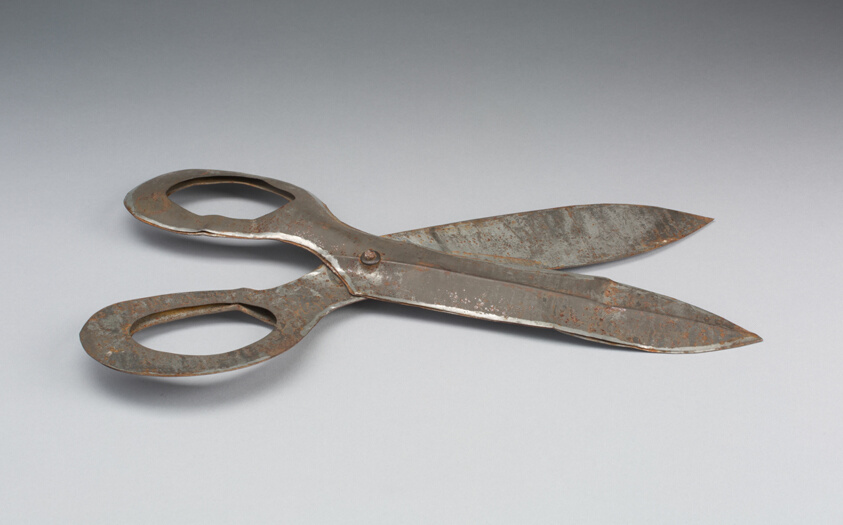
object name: Decorative Arts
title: Scissors (Anniversary Tin)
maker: Artist unknown (American, 19th century)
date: 1850–1900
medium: Tin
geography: United States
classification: metalwork; american decorative arts; american arts; decorative arts